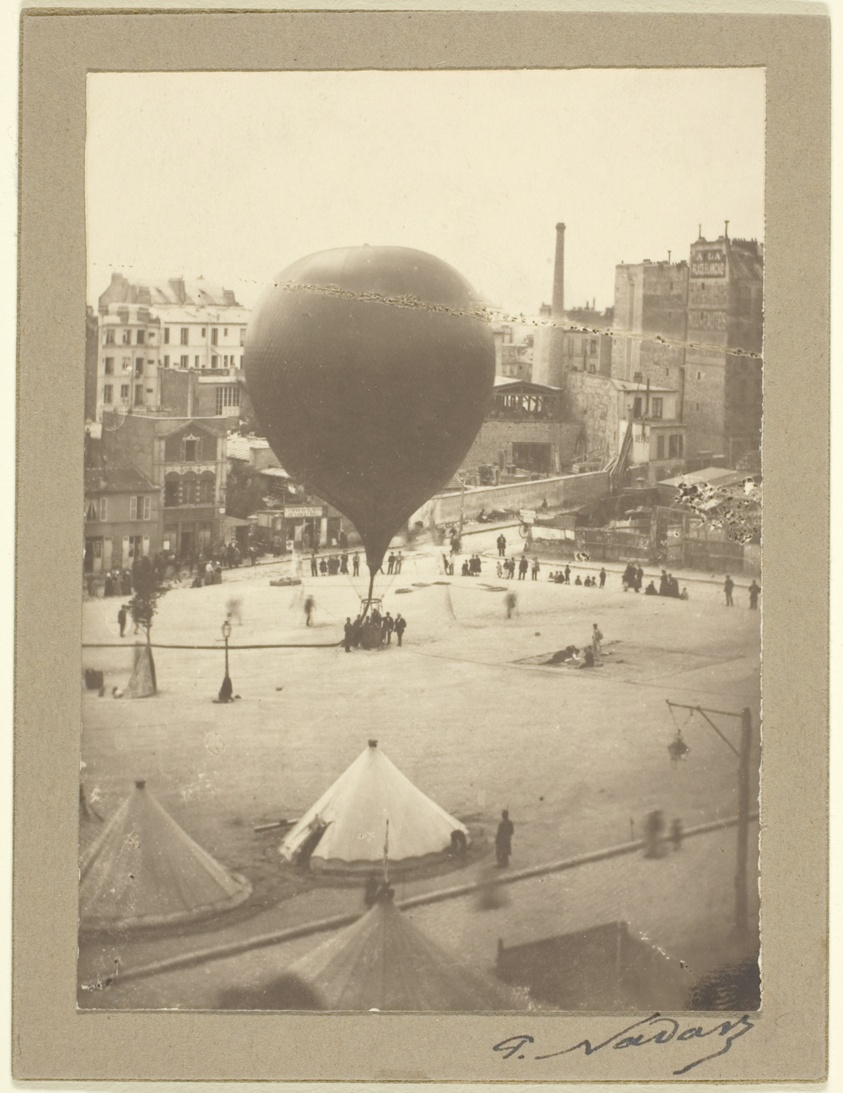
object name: Photograph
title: Le Neptune, Place Saint-Pierre à Montmartre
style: 19th century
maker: Nadar (Gaspard Félix Tournachon) (French, 1820–1910)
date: September 23, 1870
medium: Gelatin silver printing out print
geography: France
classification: gelatin silver printing-out-paper print; photographic process; photography; photograph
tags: Paris, cityscapes